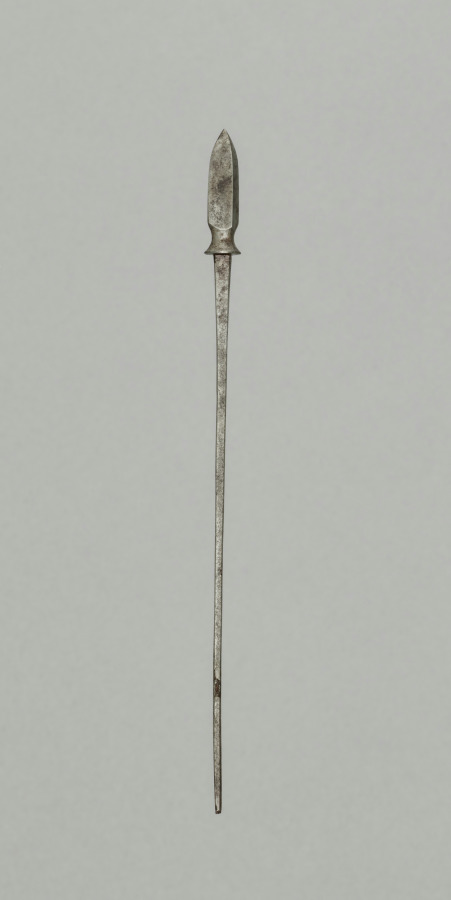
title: Arrow Point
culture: Japan, Edo period (1615–1868)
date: 1700s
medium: steel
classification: Arms and Armor